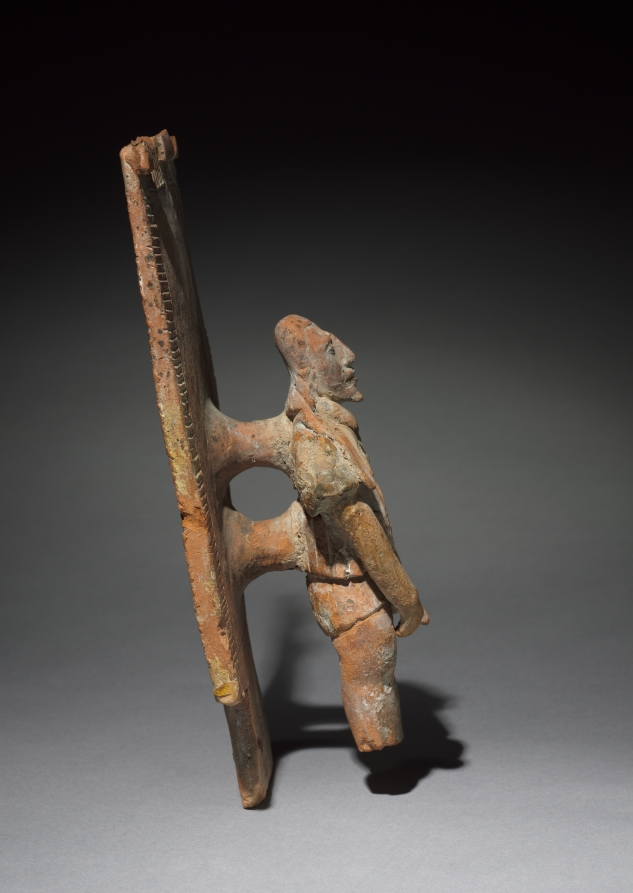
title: Figurine with Back Rack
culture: Mexico, Maya, Jaina style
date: 300–900 CE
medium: molded and modeled pottery with traces of pigment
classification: Sculpture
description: Maya figurines—made by hand, with molds, or sometimes a combination of the two techniques—represent a wide range of human, animals, and supernatural beings. This example is a male with an enormous backrack, an article of ceremonial attire worn by dancers and other courtly personnel. Figurines have been found in tombs and offerings but also in household contexts.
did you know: Figurines from Jaina, an elite Maya burial ground, served as companions for the dead.